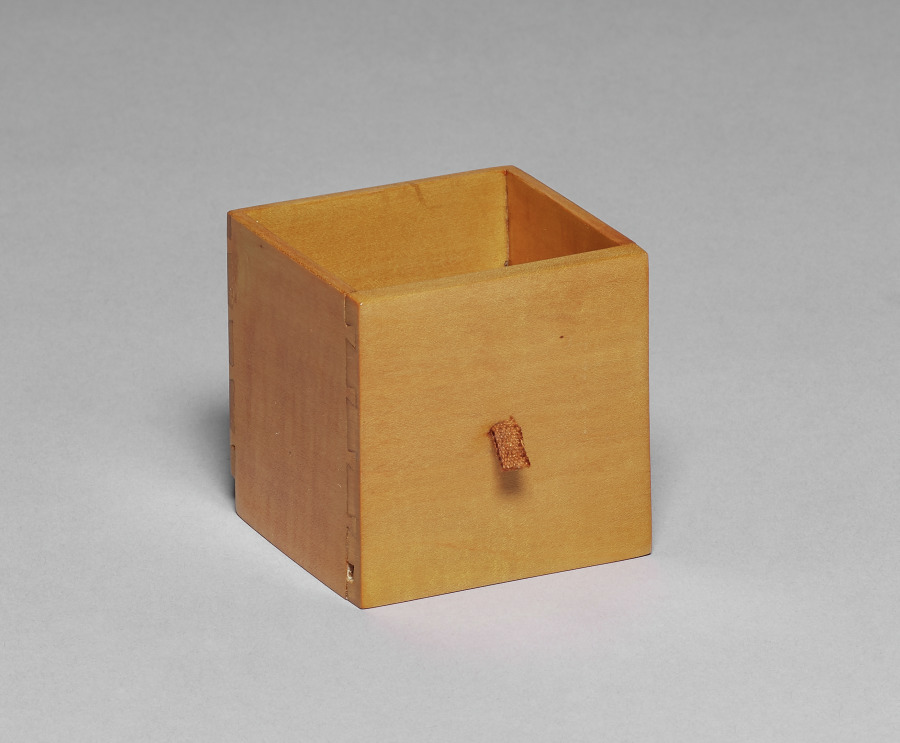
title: Concealed Drawer for a Globe Work Table (Globustisch)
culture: Austria, Vienna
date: c. 1810–15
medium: Burl walnut veneer, mahogany, ebony, satinwood, gilt wood, painted wood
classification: Furniture and woodwork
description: Work tables resembling globes were the usual form for a lady's sewing or writing table around 1800 in Austria. Combining moving parts, secret compartments, and highly finished decoration, these tables were also a way for the cabinetmaker to show off his skill. The tripod supports and temple-like architectural quality of both the exterior and interior decoration reflect the fashionable taste for neoclassical style, or Biedermeier as it was called in Austria, where Vienna was the center of such elaborate furniture production.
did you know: The top half of the globe rotates upward to reveal hidden compartments for sewing tools, threads, and unfinished fabric pieces.